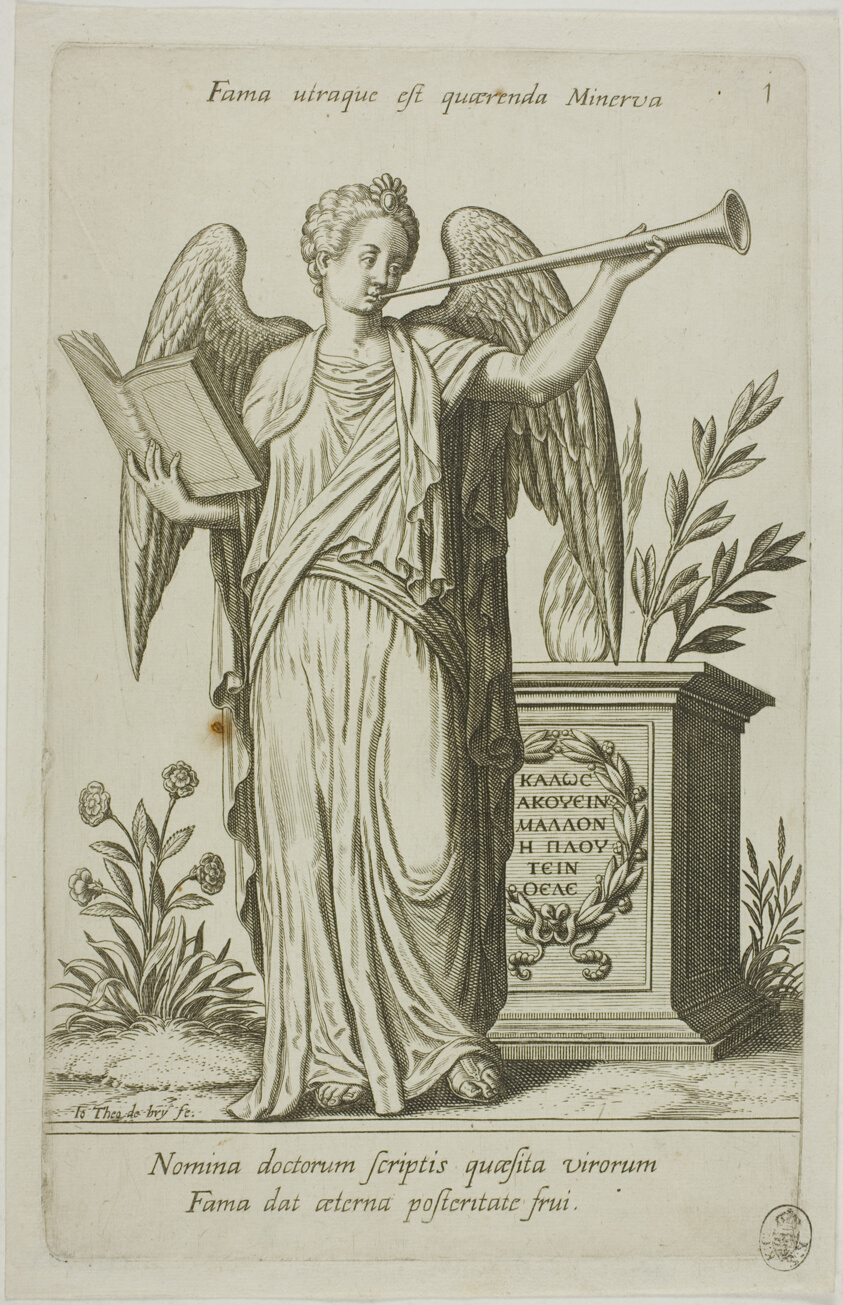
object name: Print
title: Fame, plate 1 from Parnassus Biceps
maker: Johann Theodor de Bry (German, 1561-1623); after Jean-Jacques Boissard (French, 1533-1598)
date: 1601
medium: Engraving in black on ivory laid paper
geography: Frankfurt an der Oder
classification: engraving; print; prints and drawing